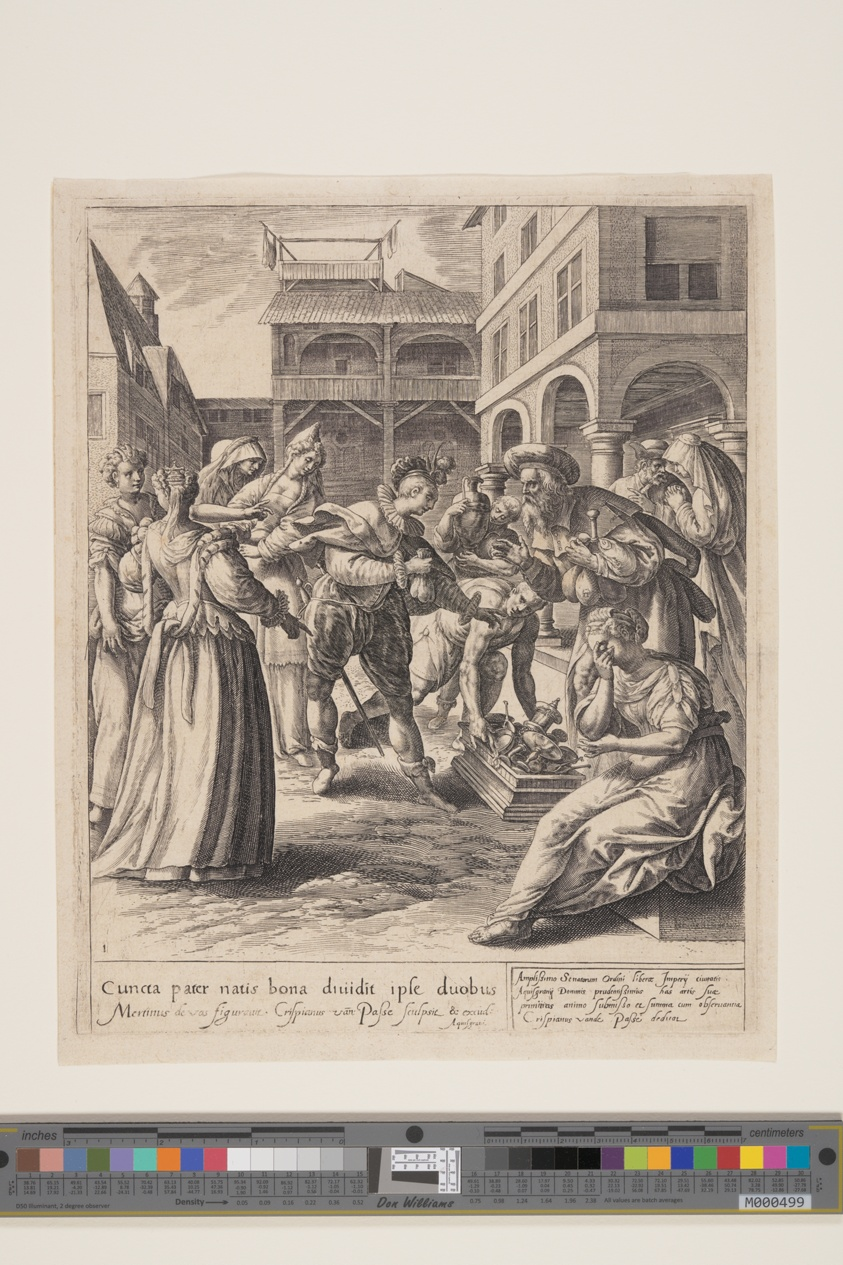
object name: Print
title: The Son Receiving His Heritage, from The Parable of the Prodigal Son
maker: Crispijn van de Passe I (Dutch, c. 1565–1637); after Maarten de Vos (Flemish, 1532–1603)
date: c. 1600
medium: Engraving on laid paper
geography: Netherlands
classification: engraving; paper; print; prints and drawing